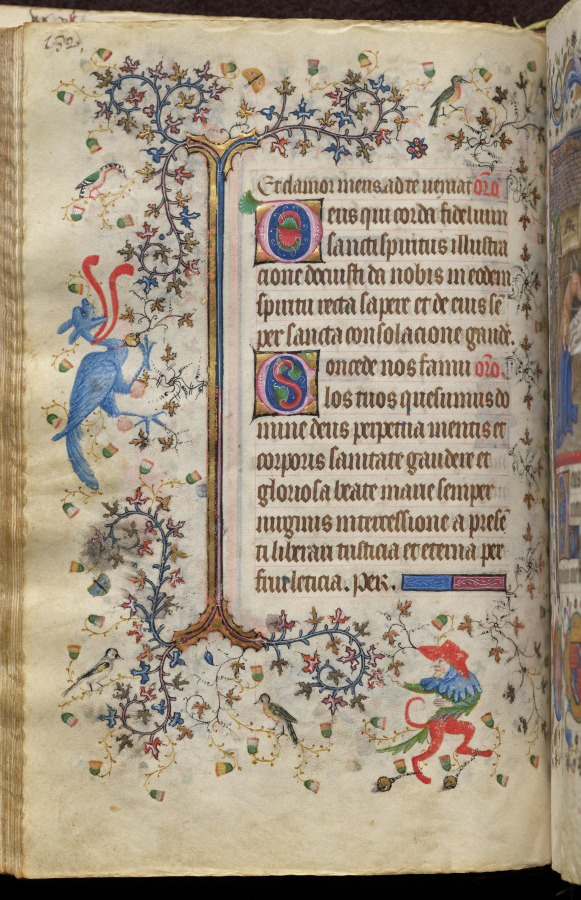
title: Hours of Charles the Noble, King of Navarre (1361-1425): fol. 66v, Text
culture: France, Paris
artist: Master of the Brussels Initials and Associates (French)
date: c. 1405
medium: ink, tempera, and gold on vellum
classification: Bound Volume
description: This precious volume was obviously highly prized by its owner, the French-born King of Navarre, who had his coat of arms painted on no less than twenty folios. Rather than directly commissioning this manuscript from a specific workshop, it seems that Charles the Noble acquired his book of hours -- perhaps ready-made for the luxury market -- while on a trip to Paris in 1404-05. A collaborative effort, six painting styles are evidenced within the pages of this codex, those of two Italians, two Frenchmen, and two Netherlanders. The painter who was responsible for the planning and decoration of the book, and who produced seventeen of the large miniatures, was a Bolognese artist known as the Master of the Brussels Initials. His principal assistant, responsible for most of the borders, was a Florentine who signed his name "Zecho" da Firenze on folio 208 verso.